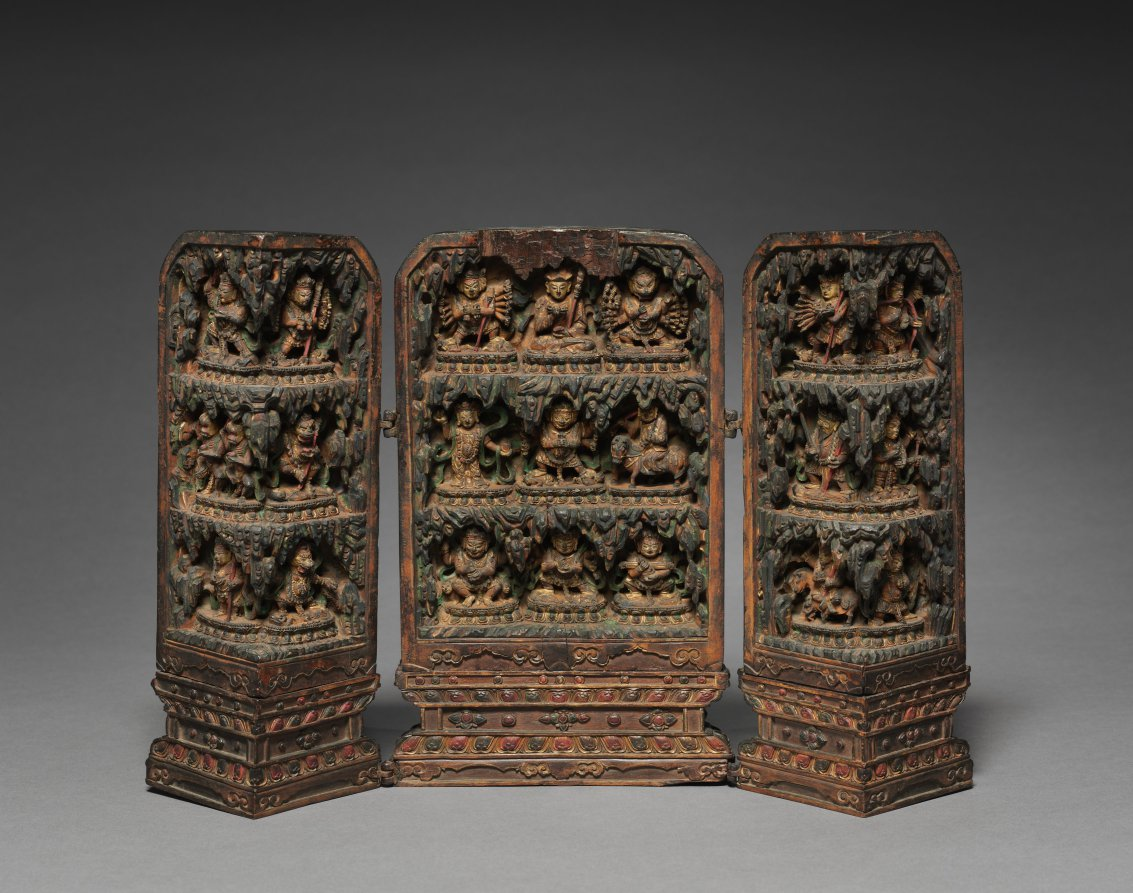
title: Portable Shrine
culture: Tibet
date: c. 1500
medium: wood with mineral pigments and metal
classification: Sculpture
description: Carved from a solid section of a log, the shrine contains images of protectors of tantric Buddhism—a branch that developed in northern India and became prominent in the Himalayas by the 700s. The central figure in the top row is Padmasambhava (Indian, active in Tibet in the 740s), venerated as the founder of one of the four main Tibetan monastic orders. Incised on the exterior are images of protectors, mantras written in Tibetan script, and a sacred funerary monument called a stupa. Tantric practice emphasizes recitation of mantras that invoke the powers of compassion, wisdom, and protection.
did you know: Tantric practice can be performed alone in any location; this shrine could be used by a traveling practitioner for meditation, visualization, prayer, and recitation of mantras.